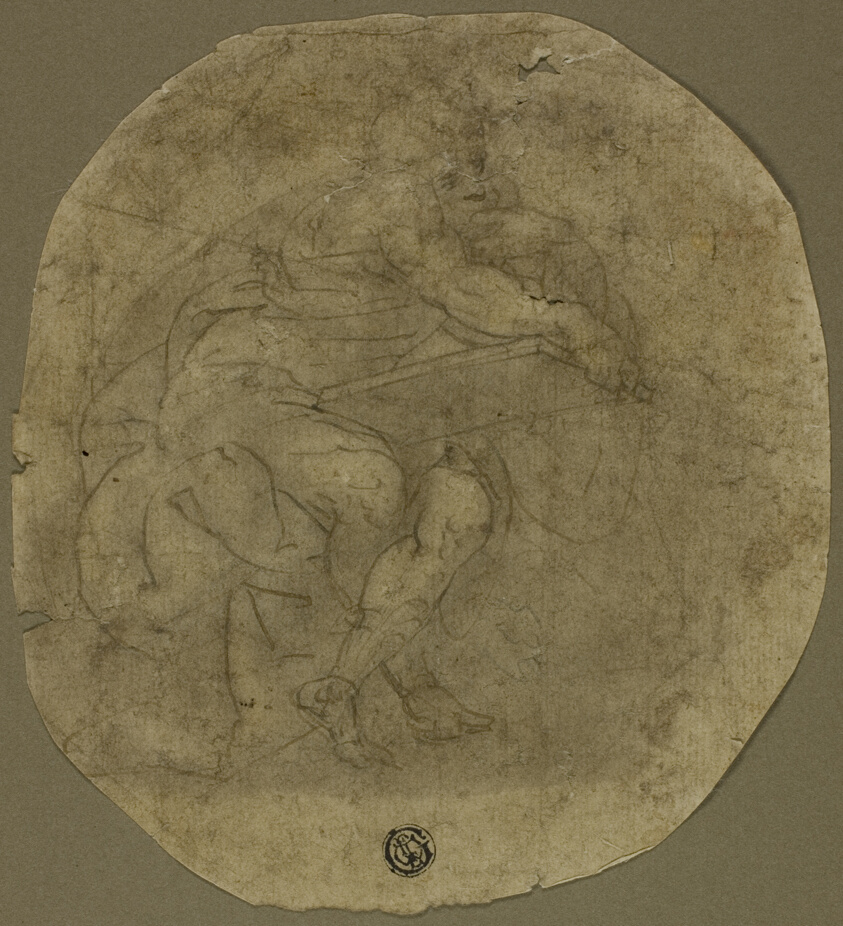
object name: Drawing and Watercolor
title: Seated Male Figure with Large Tablet (recto); Figure Study (verso)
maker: Follower of Luca Cambiaso (Italian, 1527-1585)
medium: Pen and brown ink with brush and brown wash, over traces of graphite (recto), and graphite (verso), on oval shaped brown laid paper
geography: Italy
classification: ink with wash; drawings (visual works); prints and drawing